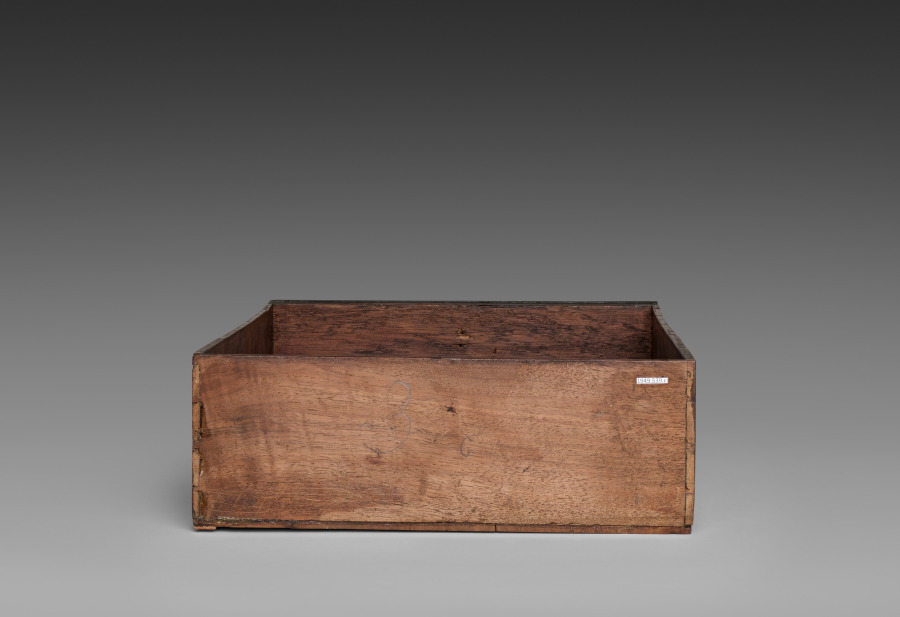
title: Interior Drawer for Cabinet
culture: France, late 17th Century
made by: André-Charles Boulle (French, 1642–1732)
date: c. 1690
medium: ebony, marquetry in metal and tortoiseshell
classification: Furniture and woodwork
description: Appointed cabinetmaker to King Louis XIV in 1672, André-Charles Boulle became a master of furniture making in France during the late 1600s until his death in 1732. Known primarily for his use of marquetry, in which metal patterns are inlaid into tortoiseshell then applied within the veneered surface of the furniture, Boulle established a level of quality and craftsmanship few others could achieve. As a result, his work found favor at the royal court and among other aristocrats and diplomats eager to impress the king. The inclusion of a medallion depicting Louis XIV within the bronze decoration of this chest would have identified the owner with the royal court. Often exhibiting stout architectural proportions with elegant groups of inlaid motifs such as the parrot on the central panel of this chest, Boulle’s designs are an example of the intellectual fashion for contrasting ideas, materials, and motifs.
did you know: Originally designed to sit atop an elaborate tall stand, this chest was likely altered in the late 1700s to reduce its scale and height.